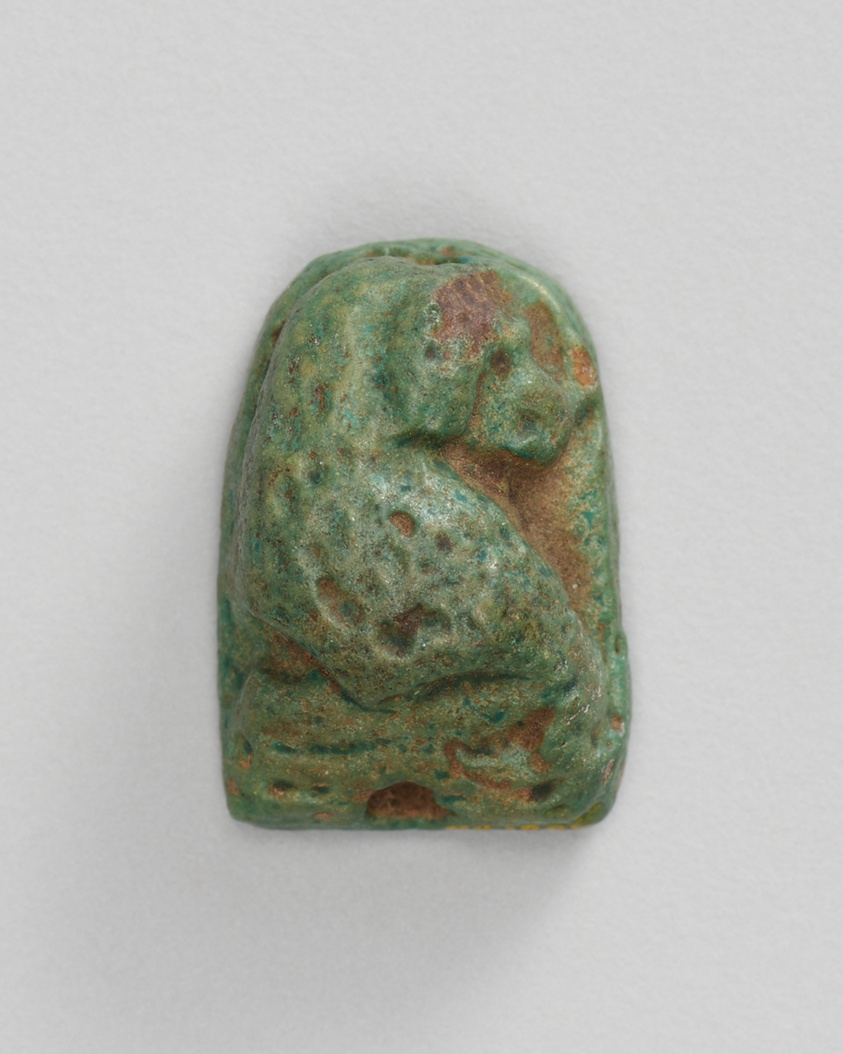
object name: Costume and Accessories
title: Scaraboid: Squatting Baboon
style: new kingdom, ancient, egyptian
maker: Egyptian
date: New Kingdom, Dynasties 18–20 (about 1550–1069 BCE)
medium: Glazed steatite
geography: Egypt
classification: scaraboids; amulet; ancient art; costume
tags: baboon, gods (deities), Hieroglyphs, deities